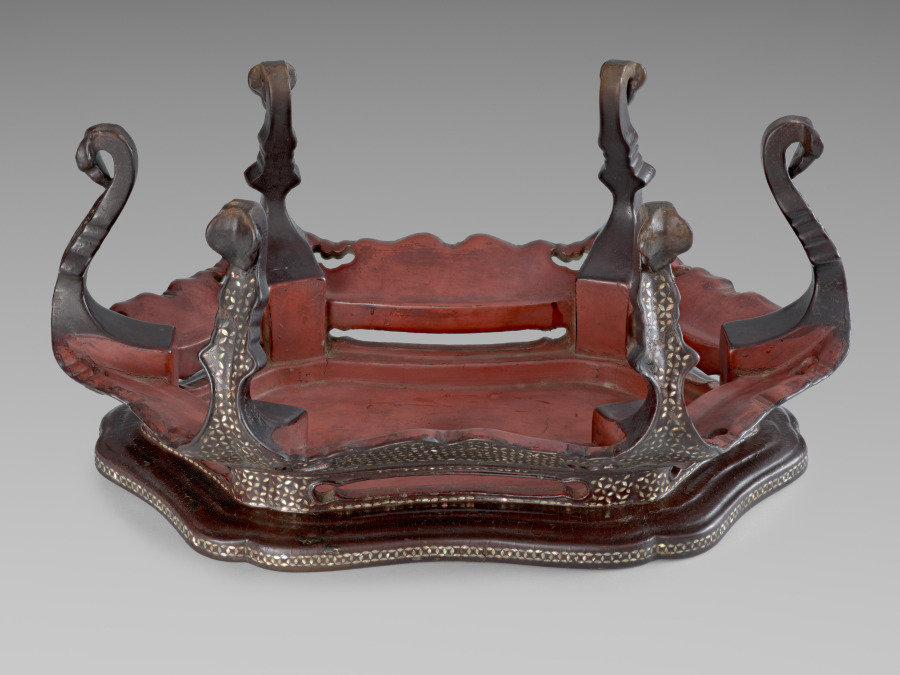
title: Hexafoil-Shaped Table with Mother-of-Pearl Inlay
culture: Korea, Joseon dynasty (1392–1910)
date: late 1400s–early 1500s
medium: Inlaid abalone shells on black lacquer ground, applied with red lacquer on the interior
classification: Lacquer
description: This low table showcases intricate mother-of-pearl and twisted brass-wire inlay forming chrysanthemum scrolls and floral lattices against black lacquer. As one of the few surviving early Joseon lacquer works employing the rare brass-wire technique, it reflects refined craftsmanship made for elite patrons. Likely used in Buddhist offering ceremonies, it would have supported precious ritual objects such as rolls of sutras or miniature Buddhist statuary.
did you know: The use of inlaid twisted brass wires in this mother-of-pearl lacquer table was first introduced in the twelfth century and is believed to have been employed in high-quality lacquerware through the end of the fifteenth century.